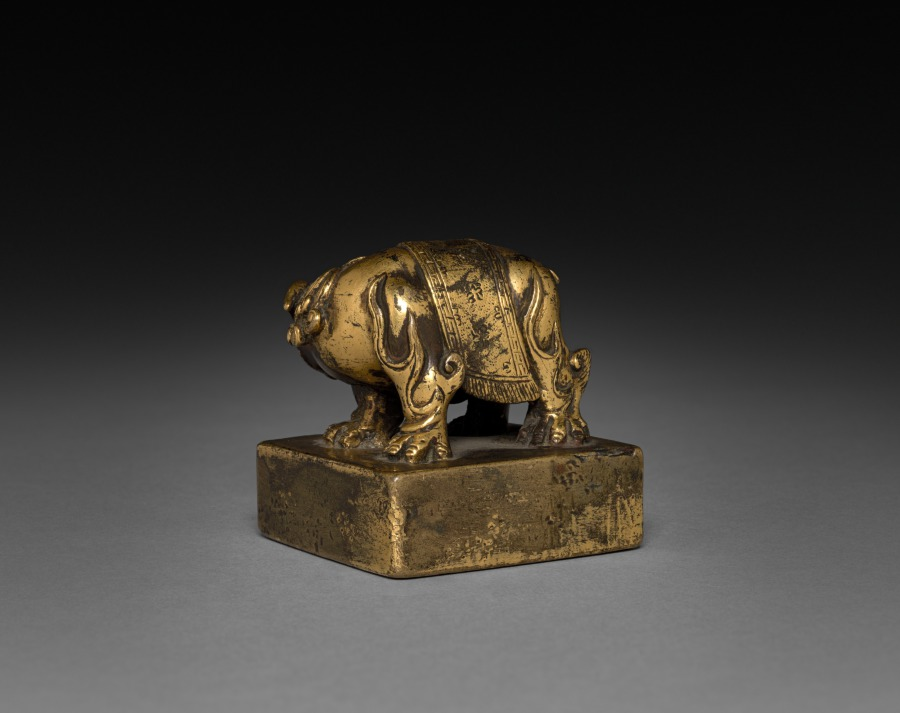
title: Seal, Lion-Dog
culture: China, Song dynasty (960-1279)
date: 960– 1279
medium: gilt bronze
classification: Metalwork